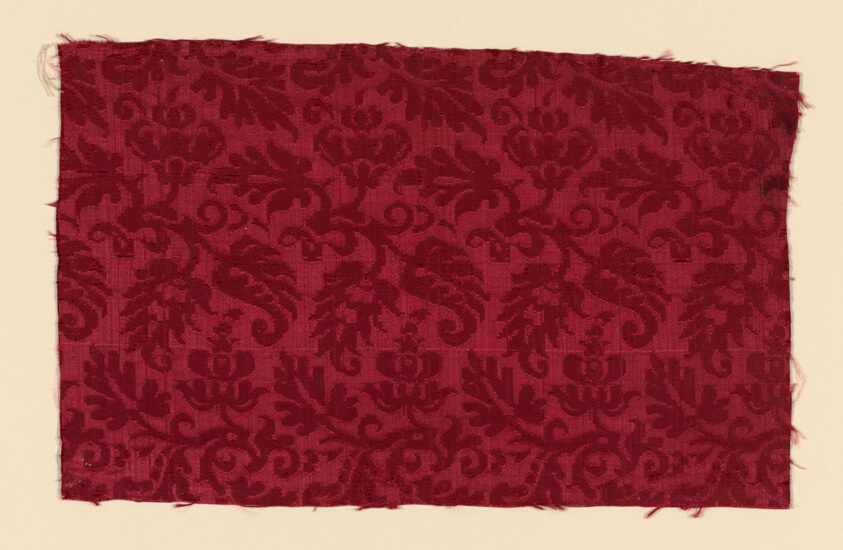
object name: Textile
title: Fragment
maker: Italy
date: 1600/50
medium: simple satin damask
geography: Italy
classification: textile; weaving